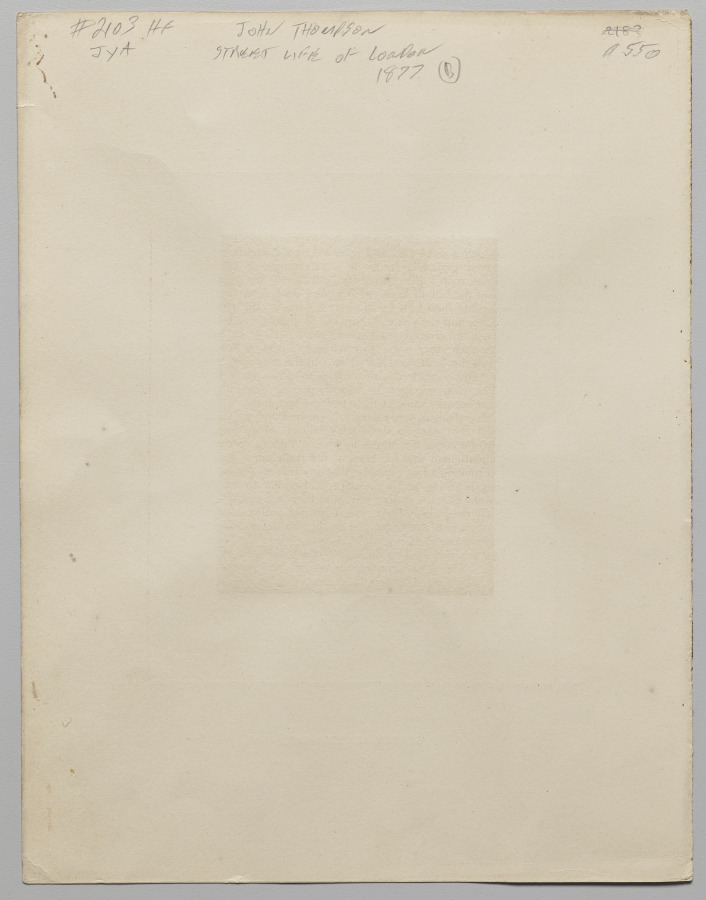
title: Street Advertising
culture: England, 19th century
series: Street Life in London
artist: John Thomson (British, 1837–1921)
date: 1876–77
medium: woodburytype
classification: Photograph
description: The poster being pasted up by the two men in the late 1870s is an ad for Mme. Tussaud’s London, a museum of wax figures that is still in business today. The image was part of John Thomson’s publication Street Life in London, a group of essays and photographsthat was one of the first published compilations of social documentary photographs. It holds a place of honor in the histories of photography, the book, ethnology, and sociology.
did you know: Mme. Tussaud’s wax museum in London was founded in 1835.